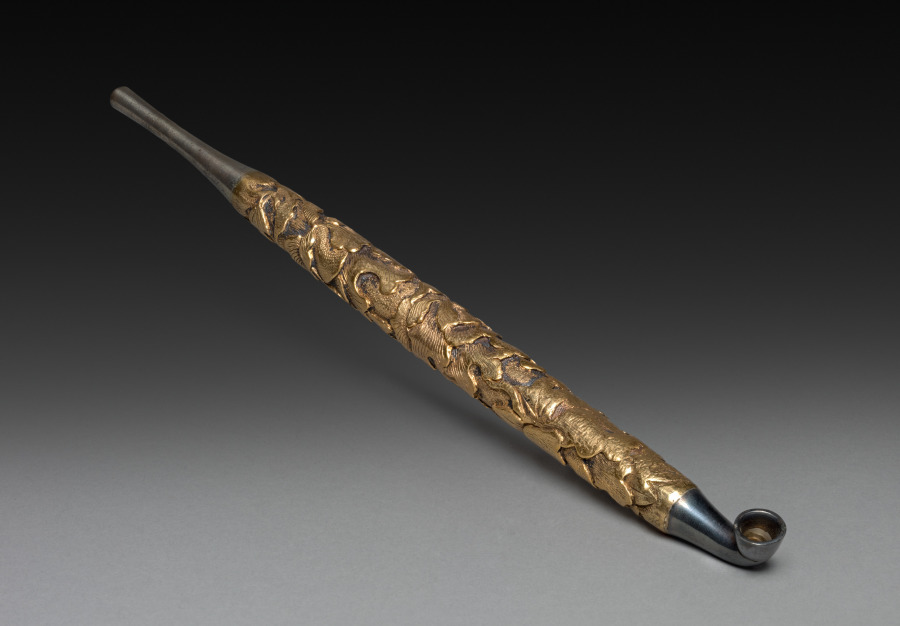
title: Tobacco Pipe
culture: Japan, Edo period (1615–1868) to Meiji period (1868–1912)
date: 1800s-early 1900s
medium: silver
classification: Miscellaneous